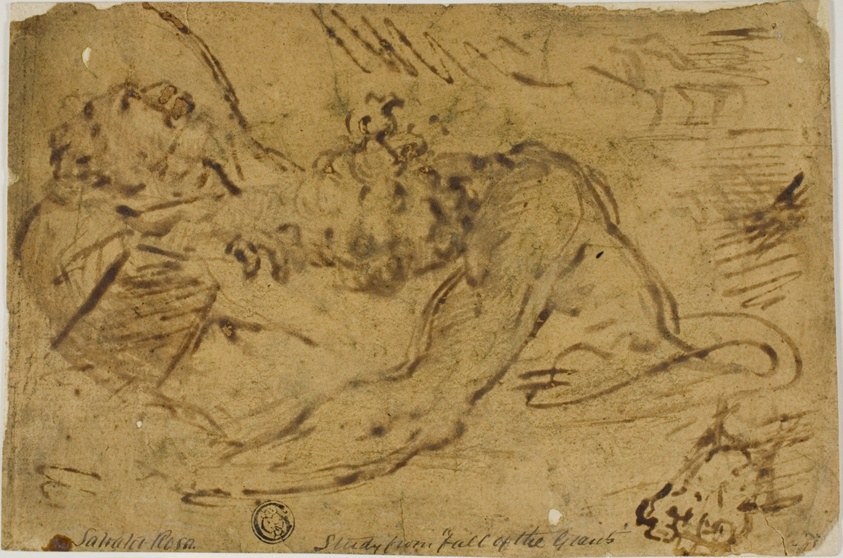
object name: Drawing and Watercolor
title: Two Grappling Figures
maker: After Salvator Rosa; Italian, 1615-1673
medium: Brush and brown ink, with traces of black chalk, on tan laid paper, laid down on ivory laid paper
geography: Italy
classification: pen and ink drawings; drawings (visual works); prints and drawing